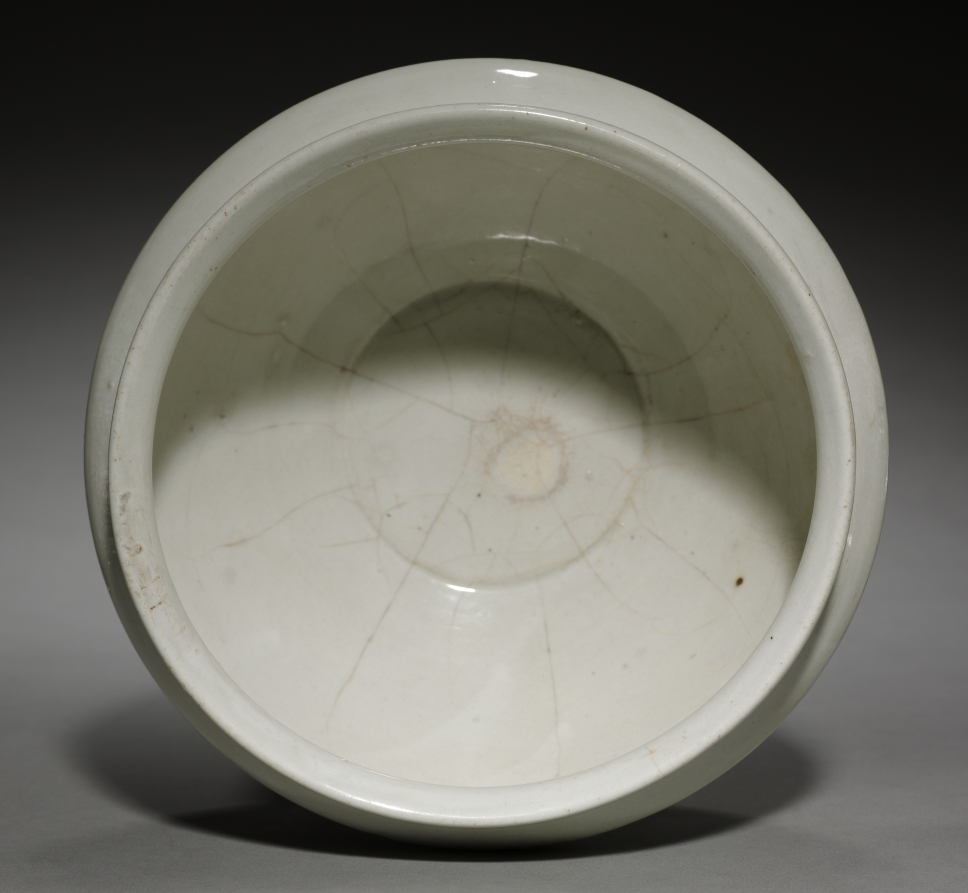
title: Bowl: Southern White Ware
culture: China, Tang dynasty (618-907) - Five dynasties (907-960)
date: late 800s-early 900s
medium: Glazed porcelain, Southern white ware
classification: Ceramic